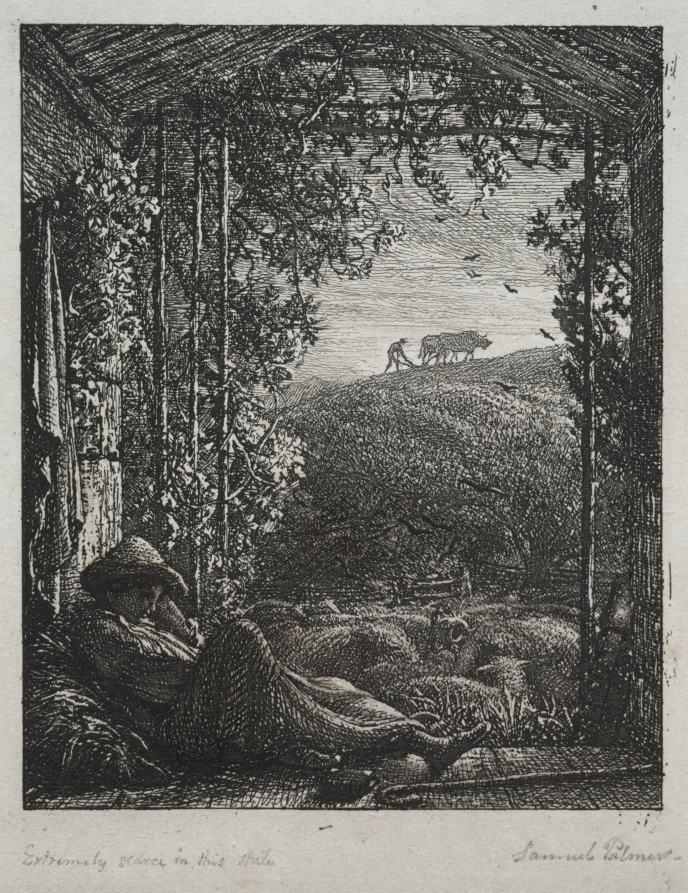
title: The Sleeping Shepherd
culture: England, 19th century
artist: Samuel Palmer (British, 1805–1881)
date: 1857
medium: etching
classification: Print